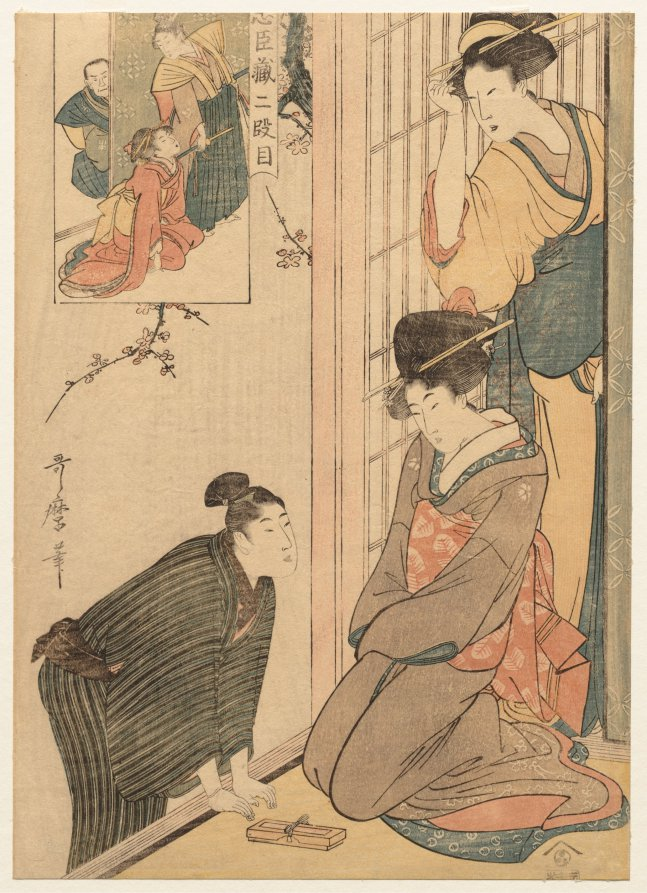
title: Chushingura: Act II of The Storehouse of Loyalty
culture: Japan, Edo period (1615–1868)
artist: Kitagawa Utamaro (Japanese, c. 1754–1806)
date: late 1790s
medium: color woodblock print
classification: Print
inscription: Signature: Utamaro hitsu Publisher: Nishimuraya Yohachi (Eiju han, emblem)